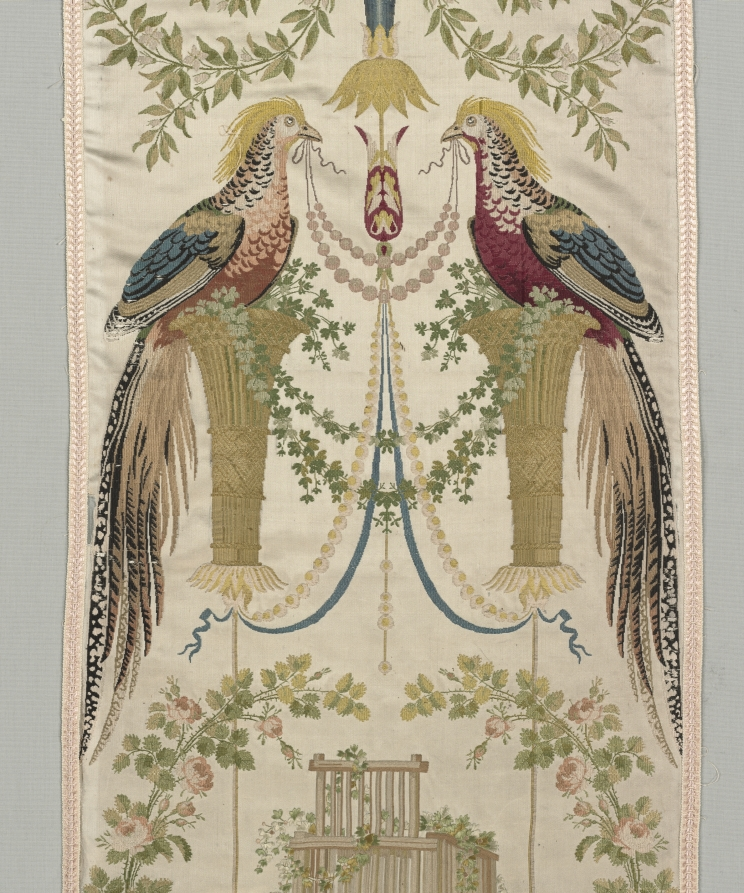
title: Wall Covering, "The Pheasants" from the "Vatican Verdures" Series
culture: France, 18th century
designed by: Jean-Démosthène Dugourc (French, 1749–1825)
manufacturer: Camille Pernon & Cie (French)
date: after 1799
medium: lampas (satin weave and plain weave variant), brocaded, embroidered (chain, satin stitches); silk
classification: Textile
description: France developed a thriving silk industry in Lyon with the goal of becoming the fashion center of Europe. Employment soared to some 20,000 workers by the time of the French Revolution in 1789. Designs changed annually, colors established new fashions, and spectacular silks were produced during the late 1700s. Dugourc, an architect who studied in Italy, became a renowned textile designer for Camille Pernon & Cie, purveyors to King Louis XVI (reigned 1774–92). He created this elaborate, balanced composition as part of elegant wall coverings for the Casita del Labrador, near Madrid. Dugourc named the series after frescos by Raphael in the Vatican.